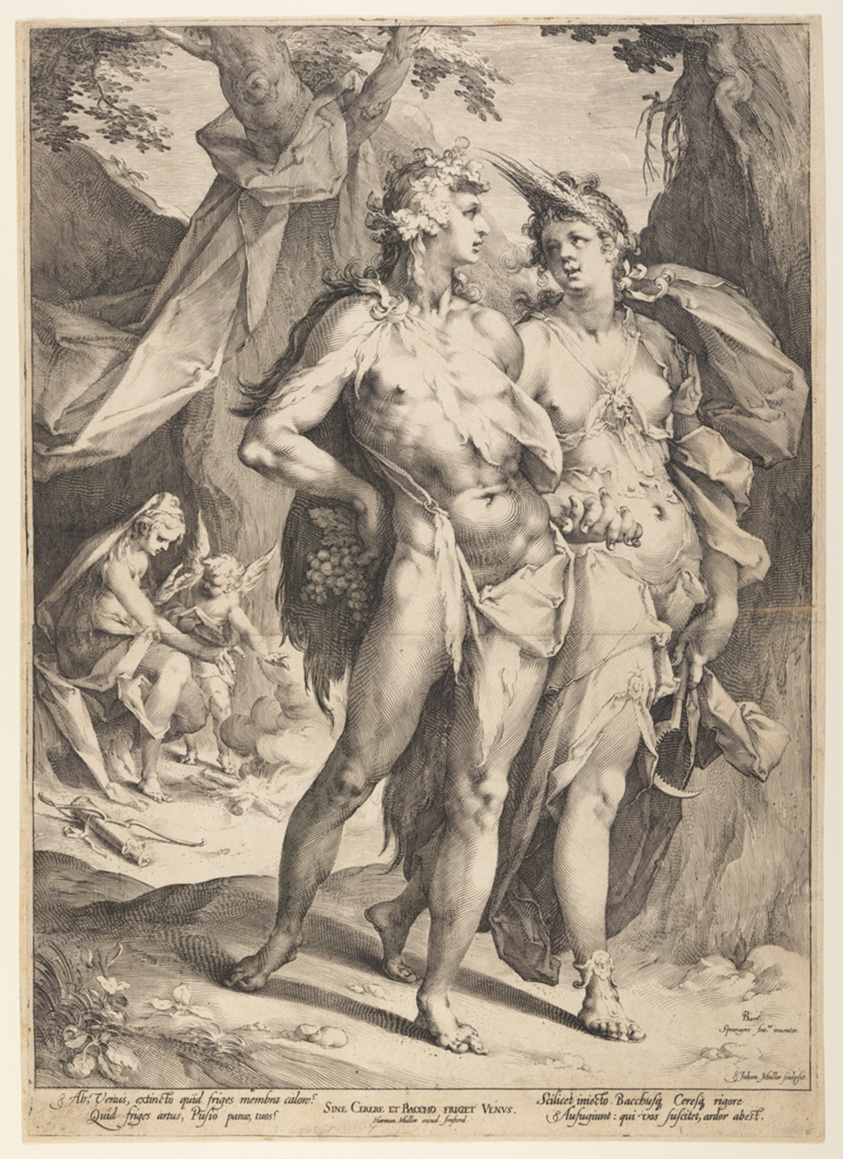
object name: Print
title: Bacchus and Ceres Leaving Venus (Sine Cerere et Baccho Friget Venus)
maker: Jan Harmensz Muller (Dutch, 1571–1628); Bartholomeus Spranger (Flemish, 1546–1611)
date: c. 1597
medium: Engraving on ivory laid paper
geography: Netherlands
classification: engraving; paper; print; prints and drawing